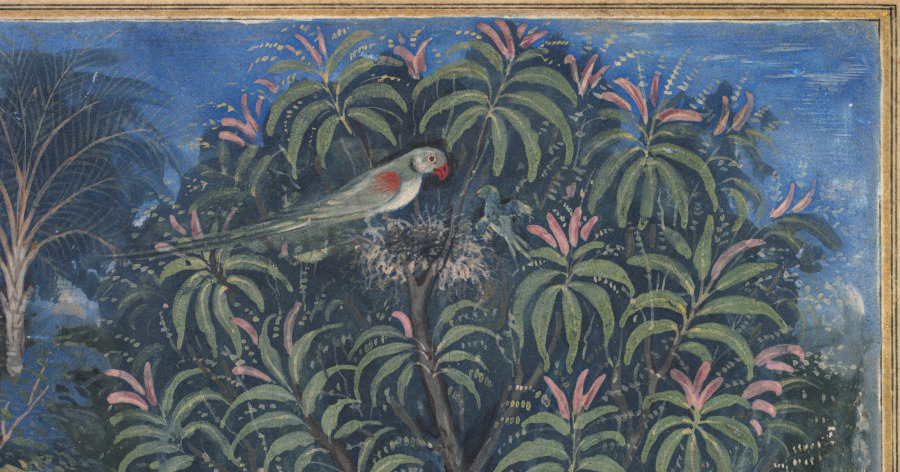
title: The parrot mother cautions her young on the danger of playing with foxes, from a Tuti-nama (Tales of a Parrot): Fifth Night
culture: Mughal India, court of Akbar (reigned 1556–1605)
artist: Dasavanta (Indian, d. 1584)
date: c. 1560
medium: gum tempera, ink, and gold on paper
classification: Painting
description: One night the parrot Tuti tells Khujasta that he hopes her relationship with her new lover does not wind up being only half-baked, like the medical treatment of the king of Kamarupa. She asks what that was about, and Tuti begins the story by telling of a mother parrot who lived in the forest with her young, who liked to play with the fox cubs who lived at the base of the tree. The mother parrot is perched on the edge of her treetop nest.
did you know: A fox cub suckles contentedly, as the mother keeps a sharp eye on the others.